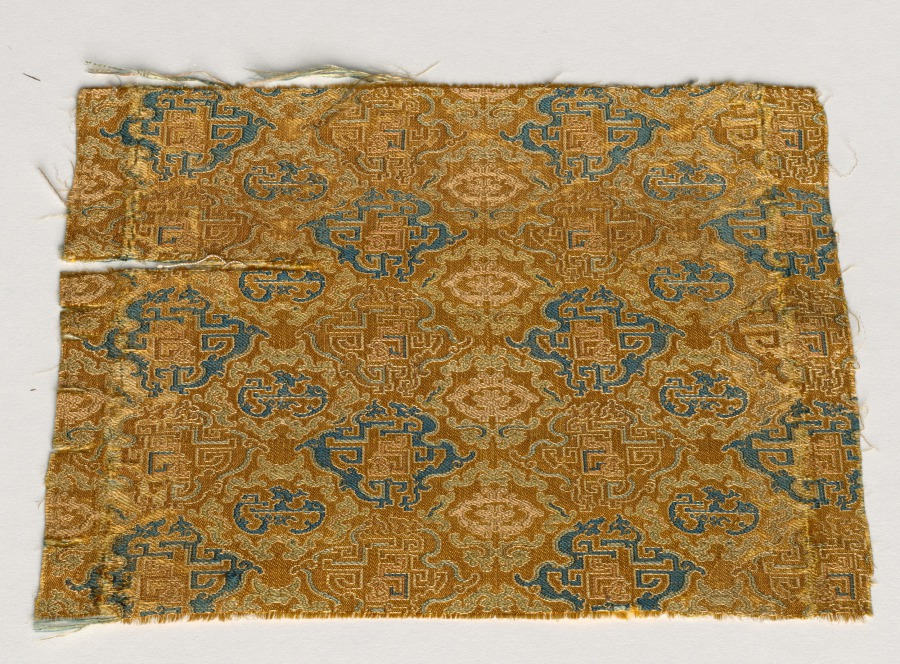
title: Fragment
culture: China, Qing dynasty (1644-1911)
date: 1800–1820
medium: Silk, diaper weave; twill ground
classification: Textile